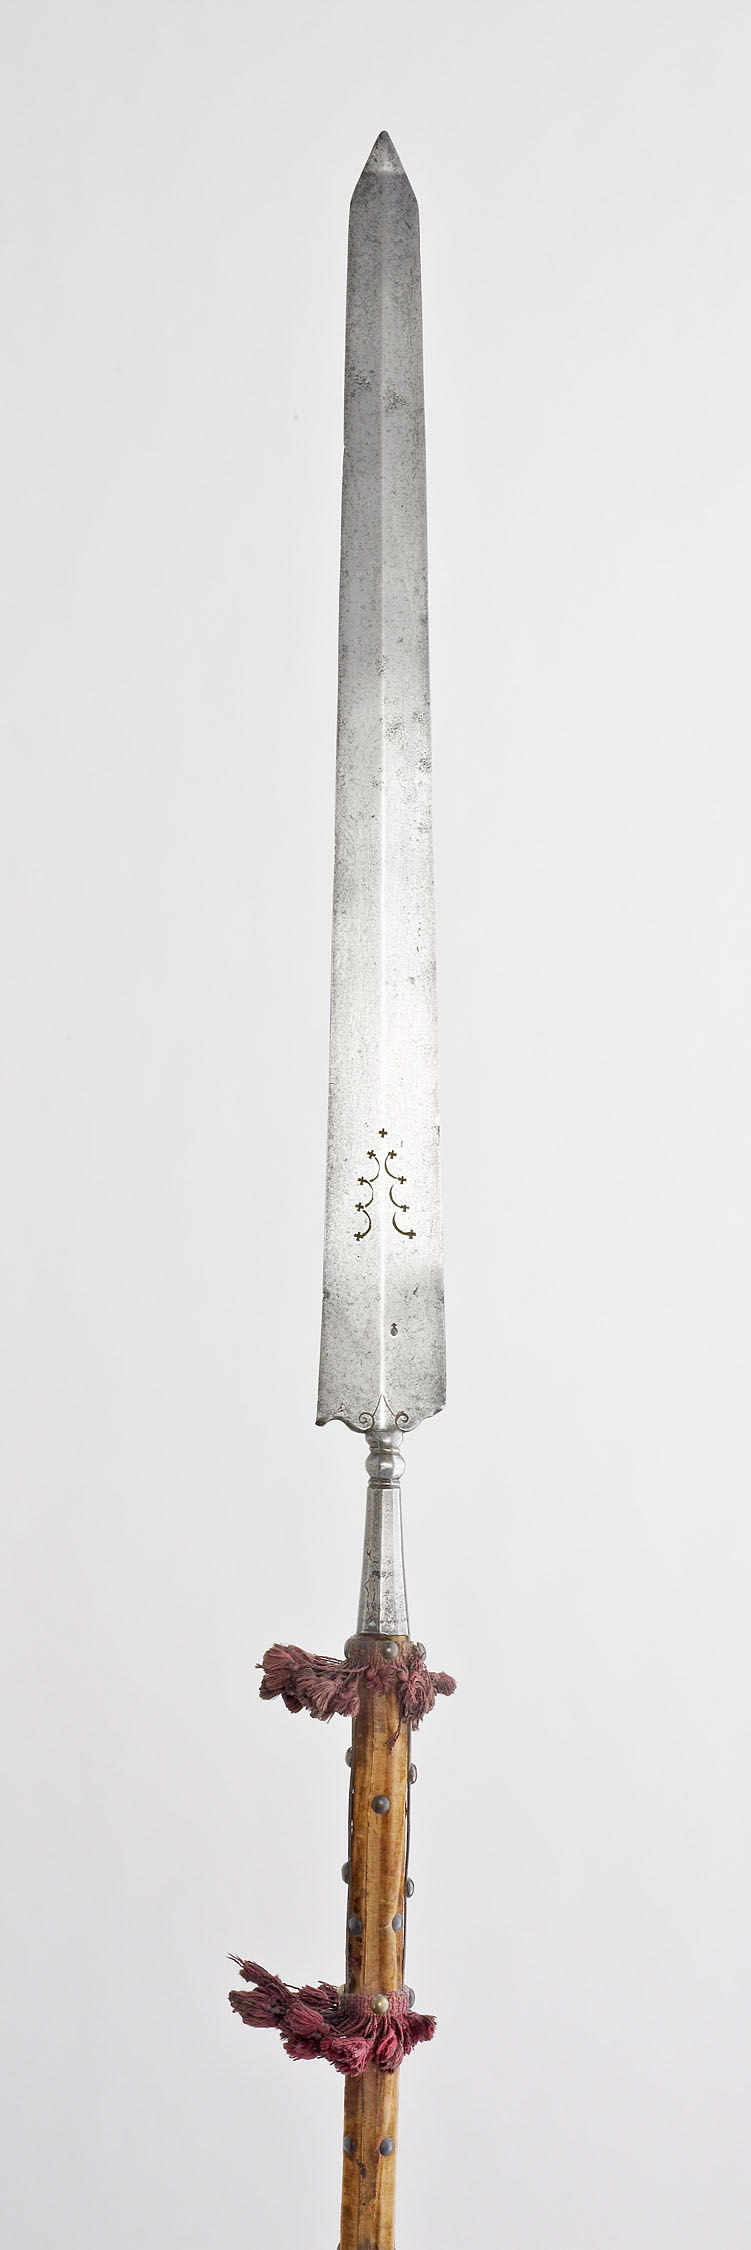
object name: Arms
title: Partisan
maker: Northern Italian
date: late 16th century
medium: Steel, wood, brass, velvet weave, and attached tassel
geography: Northern Italy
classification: edged weapon-staff; arms; arms and armor